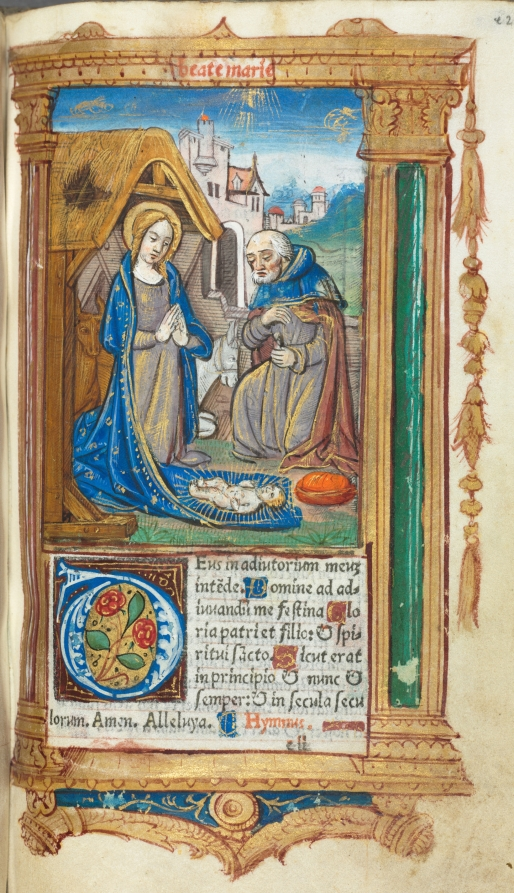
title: Printed Book of Hours (Use of Rome): fol. 34r, The Nativity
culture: France, Paris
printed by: Guillaume Le Rouge (French, Paris, active 1493–1517)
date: 1510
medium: 112 Printed folios on parchment, bound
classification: Bound Volume